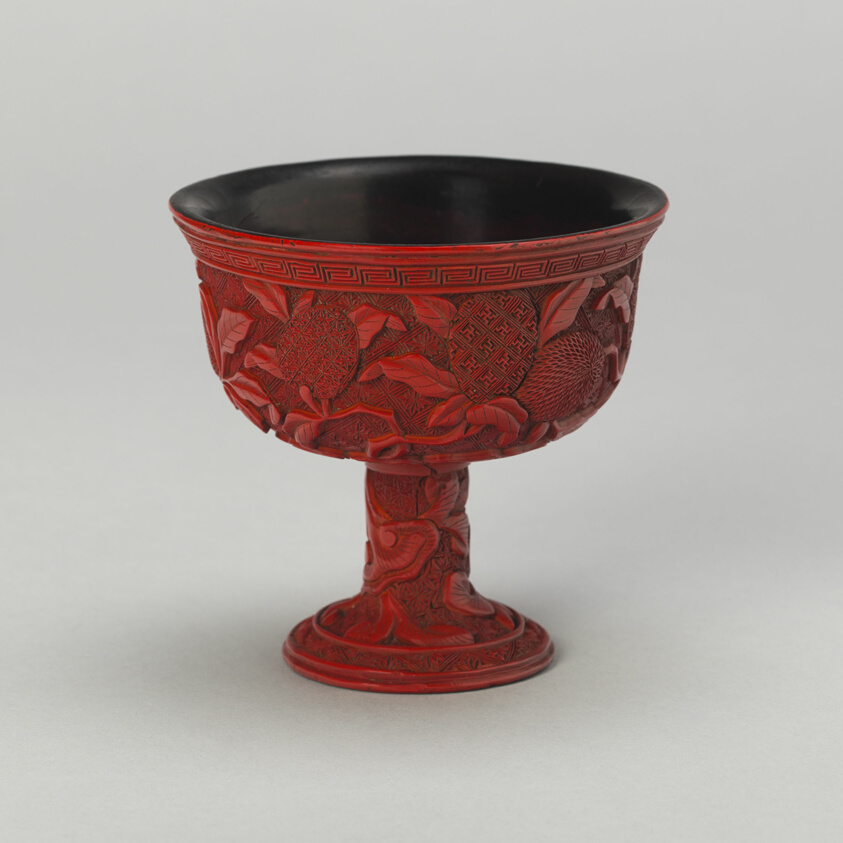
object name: Vessel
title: Stem Cup with Leechee and Vines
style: Chinese (culture or style)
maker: China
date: Ming dynasty (1368–1644), late15th/early 16th century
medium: Carved cinnabar lacquer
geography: China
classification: drinking vessel; lacquerware; asian art; vessel